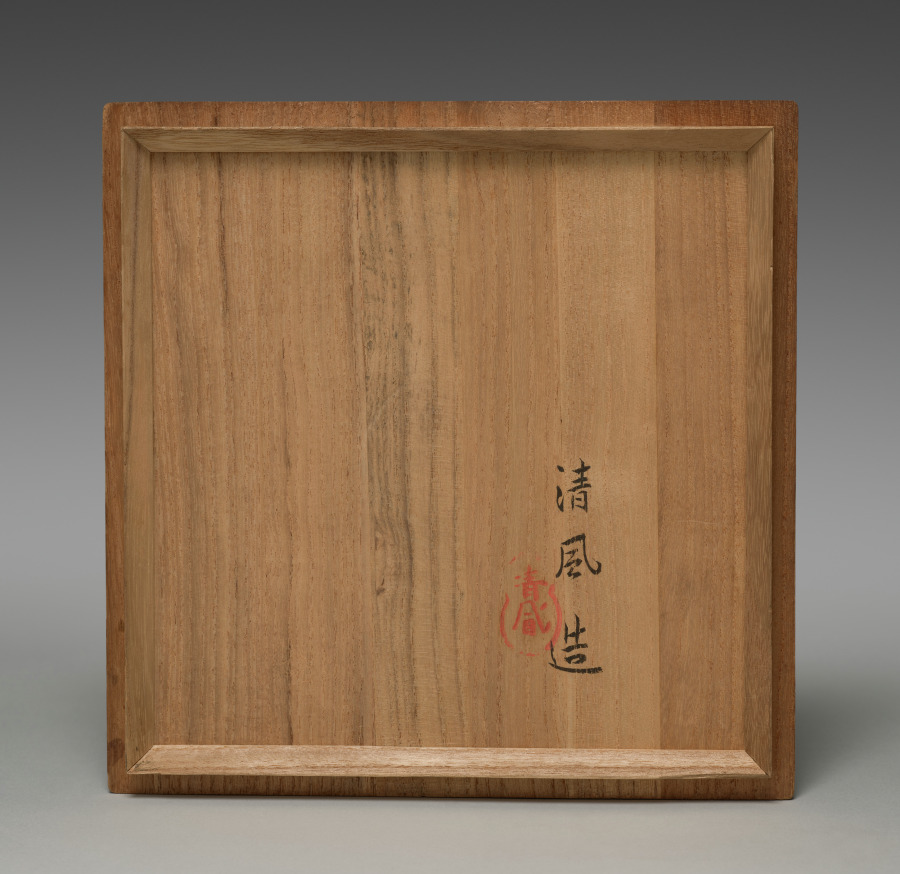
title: Bowl with Old Pine and Poem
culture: Japan, Taishō period (1912–26) or Shōwa period (1926–89)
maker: Seifū Yohei IV (Japanese, 1872–1951)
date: 1914–46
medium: Porcelain with molded and carved design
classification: Ceramic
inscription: 鶴樹君子風拂太平枝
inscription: 清風造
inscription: 清風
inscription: 成山清風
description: A grand, aged pine is carved into the body of this bowl. The inscription on the reverse side explains the tree’s presence. It is an altered version of two lines from a poem by Li Jiao (646?–715?) called “Pine.” Li Jiao was a senior government official who had a tumultuous career under the reign of Wu Zetian (r. 690–705), as well as those of her sons and grandson during the Tang dynasty (618–907). Although little known today, his work was read in Japan during the Heian (794–1185) and Kamakura periods (1185–1333). An anthology containing his poems, which was lost in China, was passed down across the generations in Japan. The translation of the inscription is as follows (the original characters, written and read from right to left, are shown below from left to right): The crane nests in the mastwood tree, the wind flicks at its peaceful branches. 鶴樹君子風拂太平枝 The mastwood is a pine-like evergreen, and the crane sheltering there is protected from the wind. In the original poem, the characters before “branches” (枝) are rather 大夫, meaning “high official.” This is likely a reference to the title bestowed upon a pine tree by the emperor Qin Shi Huang (r. 221–210 BCE) in thanks for its protection when a fierce rain fell as he ascended Mount Tai to pay his obeisance to the heavens.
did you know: The box inscription identifies the bowl's glaze as kanpakuyū, "bright-jewel white glaze."